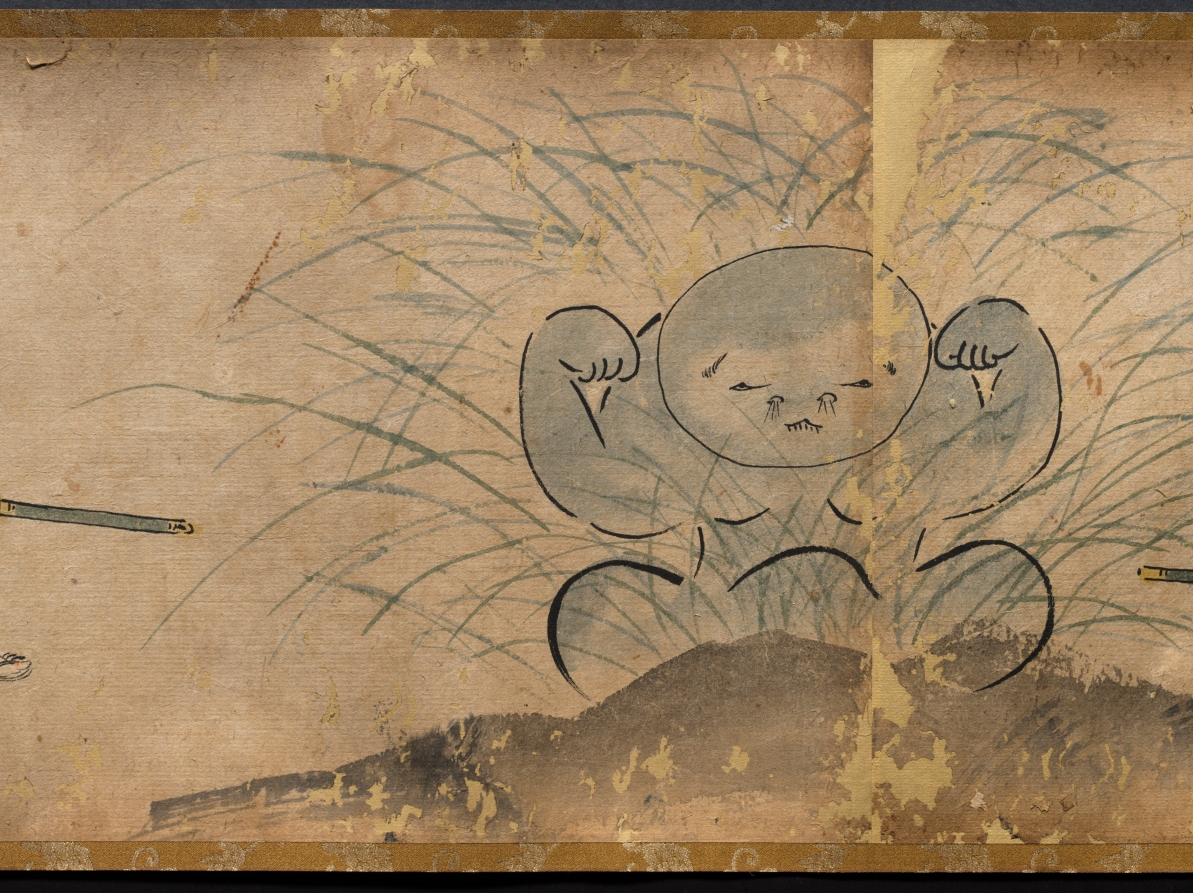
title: The Illustrated Tale of Oishi Hyōroku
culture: Japan, Edo period (1615–1868)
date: 1700s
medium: handscroll; ink and color on paper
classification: Painting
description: This incomplete handscroll illustrates part of the story of Oishi Hyoroku, a young man tasked with battling fox apparitions who were creating problems in his town. In other extant versions of the scroll, the story is set in the fall of 1624 in Kagoshima in southern Japan. Throughout the story, Hyoroku is tricked and terrified by the foxes that shift their shapes into a variety of monstrous phantoms. After repeated humiliations, he eventually captures two of the foxes. In this version, colloquial texts that function like text blurbs in comics appear throughout the scroll, but the main text is missing.